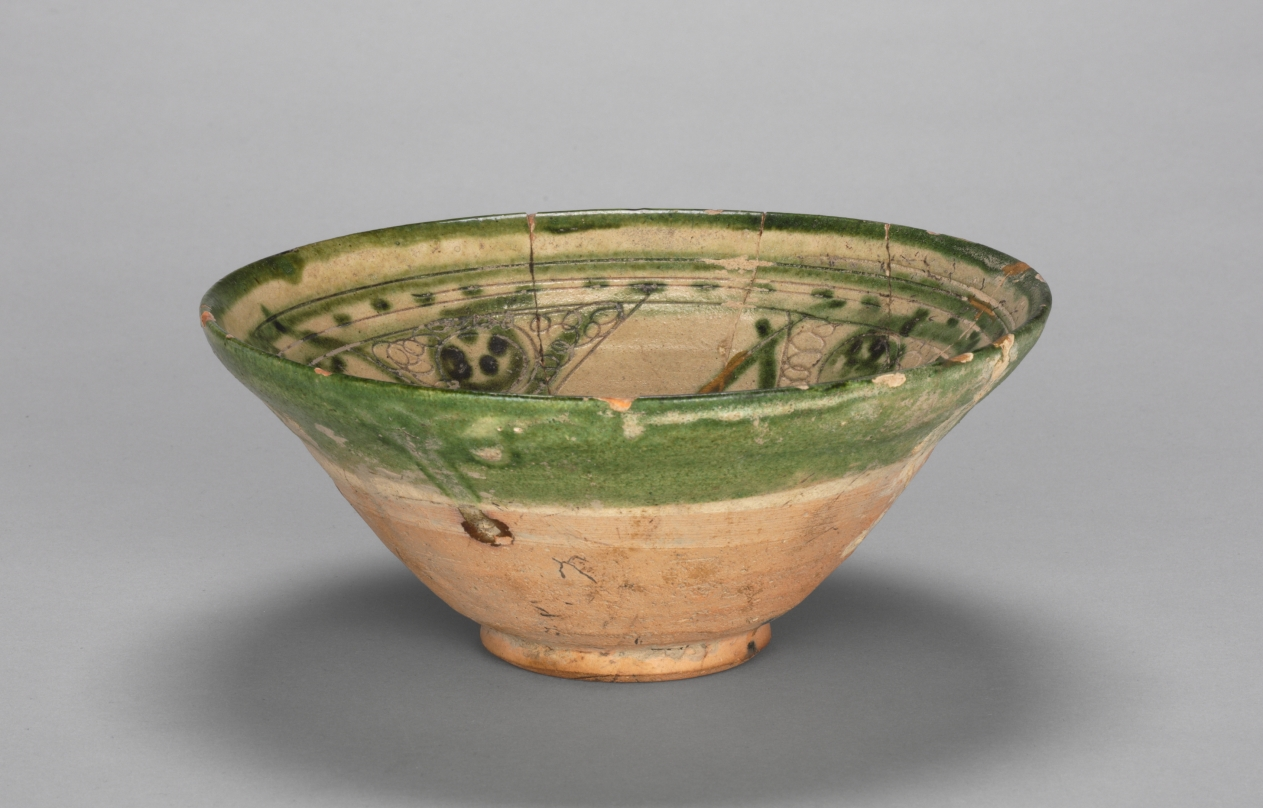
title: Bowl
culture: Iran, Amul, 11th-12th century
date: 1000s-1100s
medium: earthenware with underglaze slip-painted decoration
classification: Ceramic